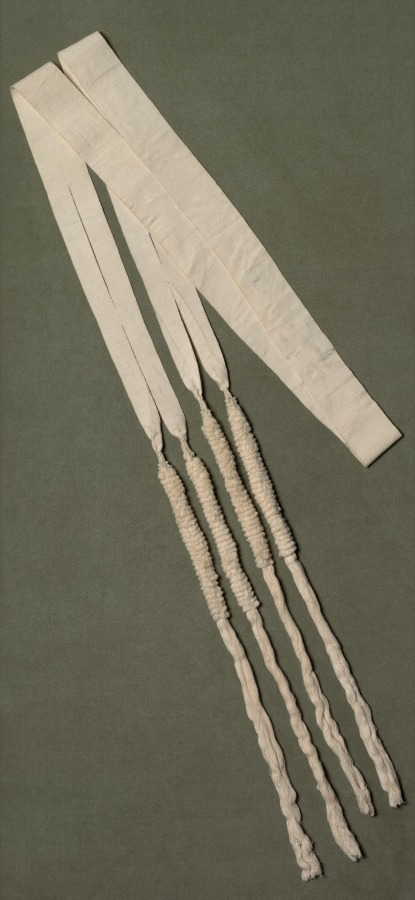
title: Band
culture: Peru, Chimú or Chimú-Inka, 12th-16th century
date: 1100–1532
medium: white cotton; plain weave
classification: Textile